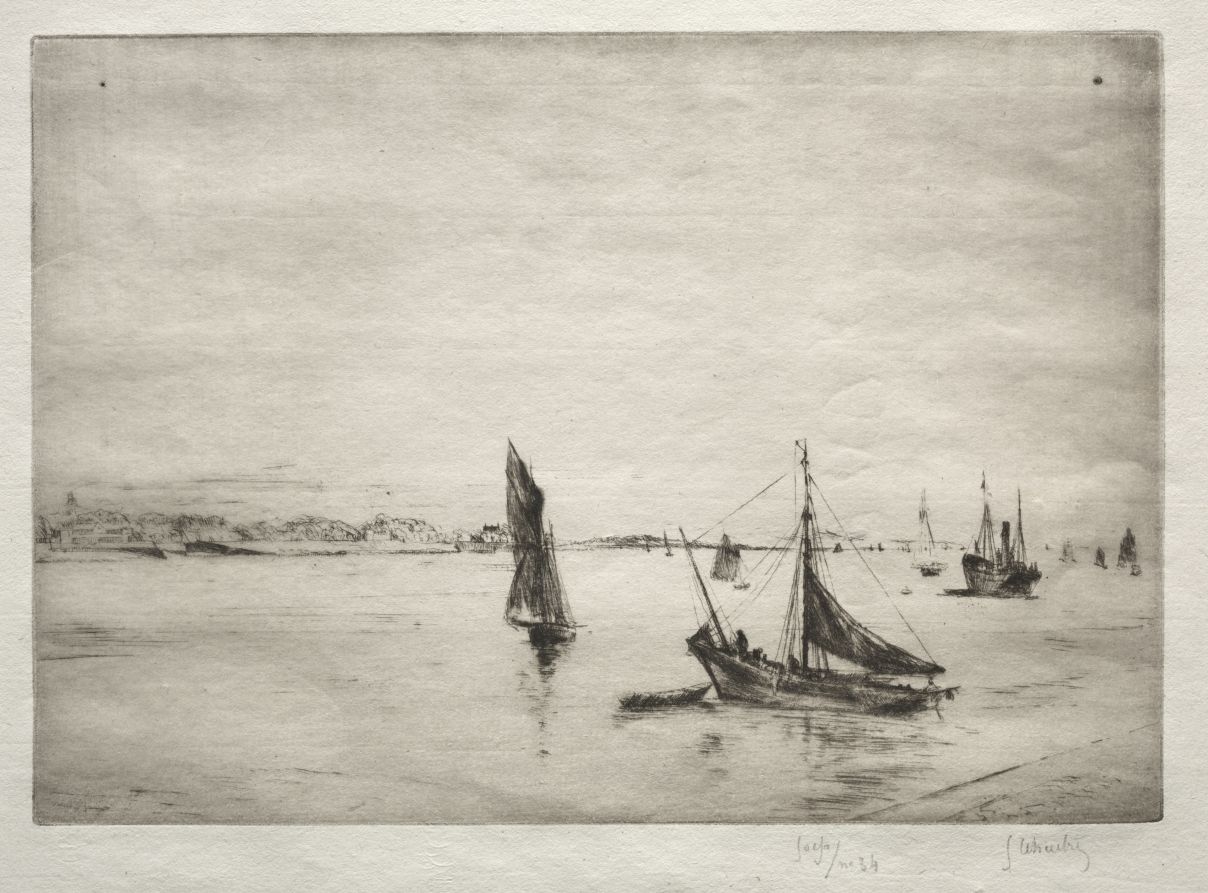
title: The Roadway of La Rochelle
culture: France, 19th-20th century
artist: Gustave Leheutre (French, 1861–1932)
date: c. 1880–1921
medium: etching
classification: Print